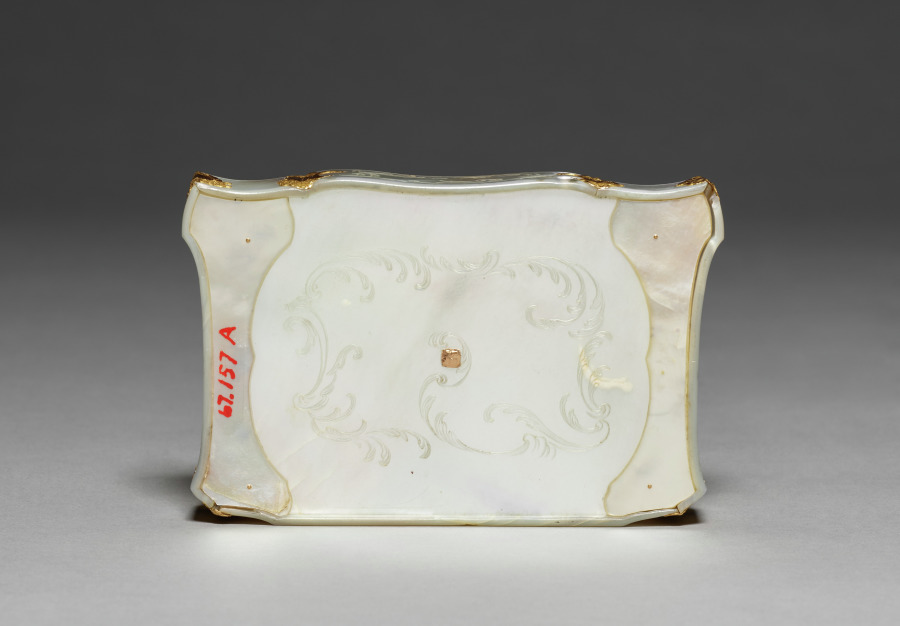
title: Drawer from a Sewing Box (Nécessaire)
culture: Austria, possibly Vienna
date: c. 1765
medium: gold and mother-of-pearl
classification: Miscellaneous